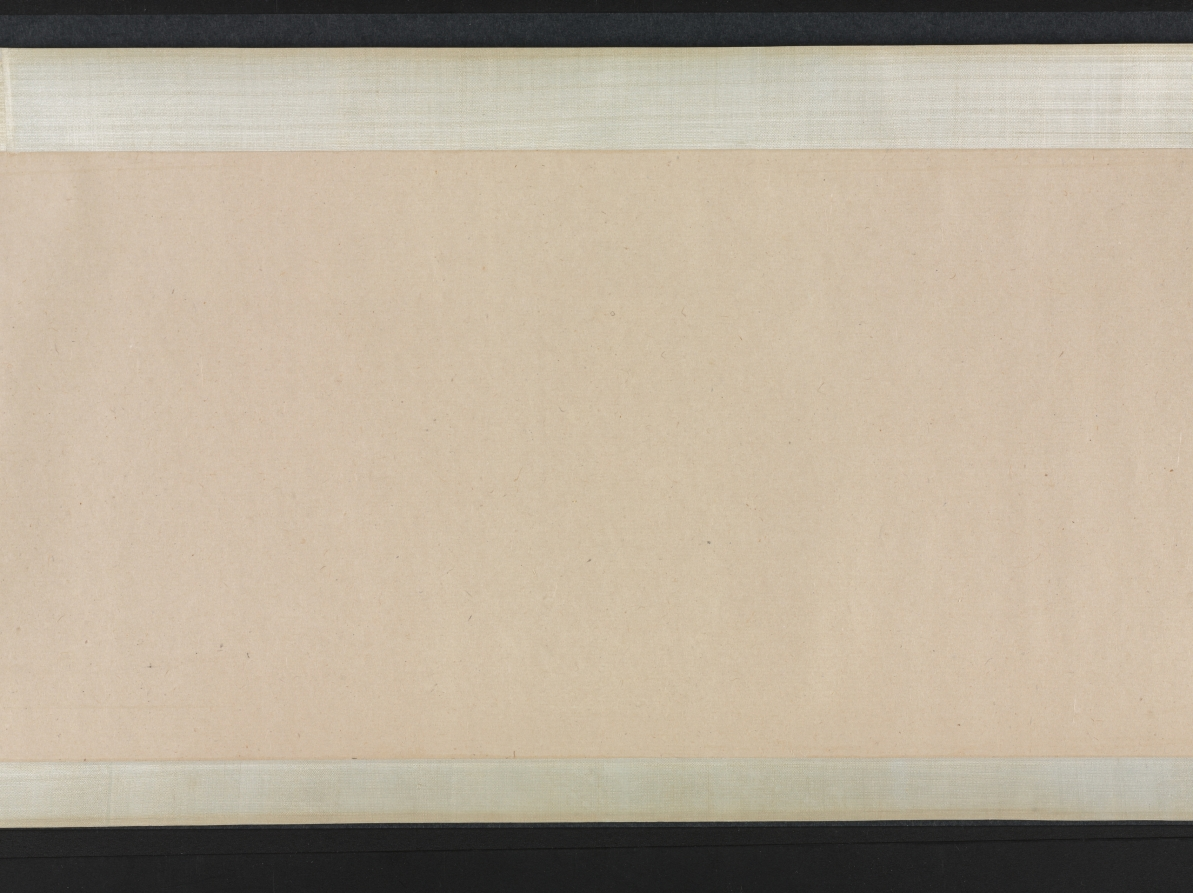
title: Saying Farewell at Xunyang (Song of the Pipa)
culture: China, Ming dynasty (1368–1644)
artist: Wen Boren (Chinese, 1502–1575)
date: 1500s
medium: handscroll, ink and color on paper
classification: Painting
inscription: "潯陽送客圖" 五峰山人文伯仁寫于停雲館中 [印] 文伯仁; 五峰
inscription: 2 colophons and 9 additional seals: 1 transcription of "Pipa xing 琵琶行” (Song of Pipa) and 3 seals of Zhu Yizun 朱彜尊 (1629-1709); 2 seals of Wu Rongguang 吳榮光 (1773-1843); 1 colophon, dated 1826, and 3 seals of Wu Xijia 吳錫嘉 (mid-1700s)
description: This handscroll depicts The Song of the Pipa, a poem by Bai Juyi 白居易 (772–846) written after the poet’s encounter with a pipa player on the Yangzi River. Expelled from her home city when her beauty and fame had faded, she played for the poet at night. Her musical performance and tragic life story resonated with Bai Juyi, who had just been demoted and exiled from life at court himself. The hazy, vast view and pale color tonalities of this painting illustrate these feelings of endless sadness, having lost one’s sense of purpose in life.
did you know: Wen Boren depicted the chilly autumn water with a fishnet pattern.